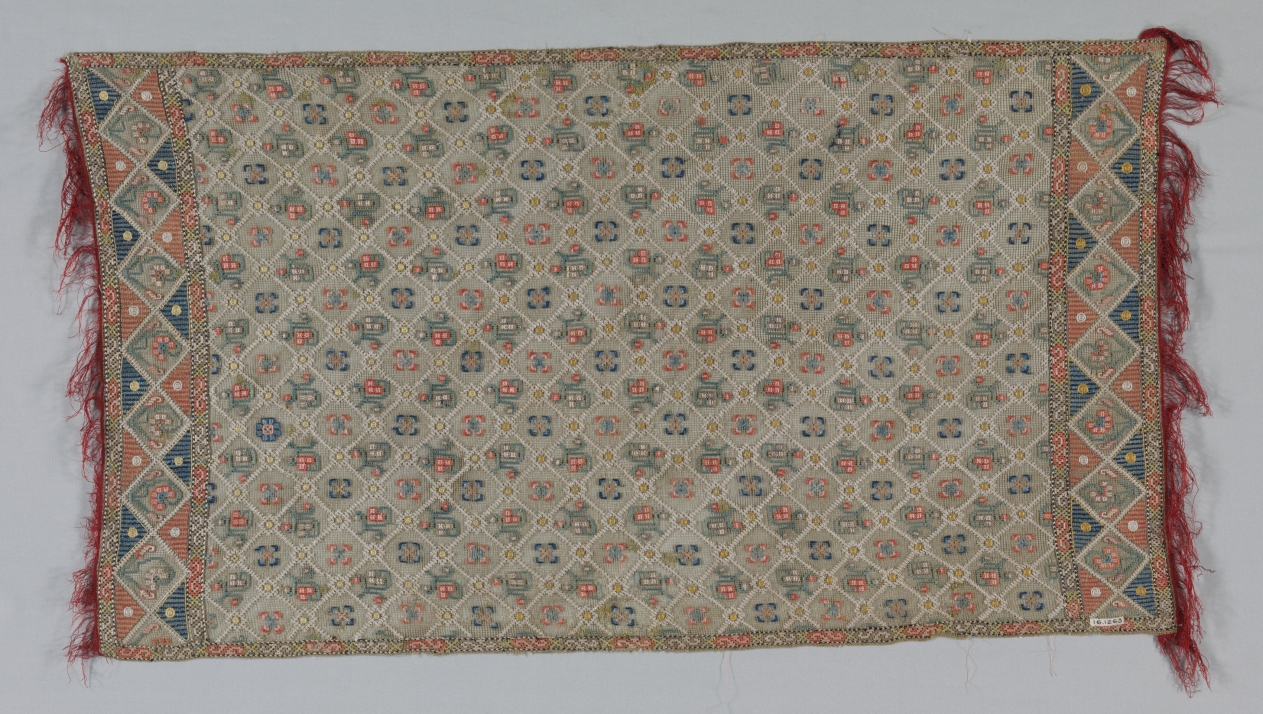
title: Embroidered Shawl (?)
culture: Turkey, 18th-19th century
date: 18th-19th century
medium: embroidery: silk on silk netting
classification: Embroidery